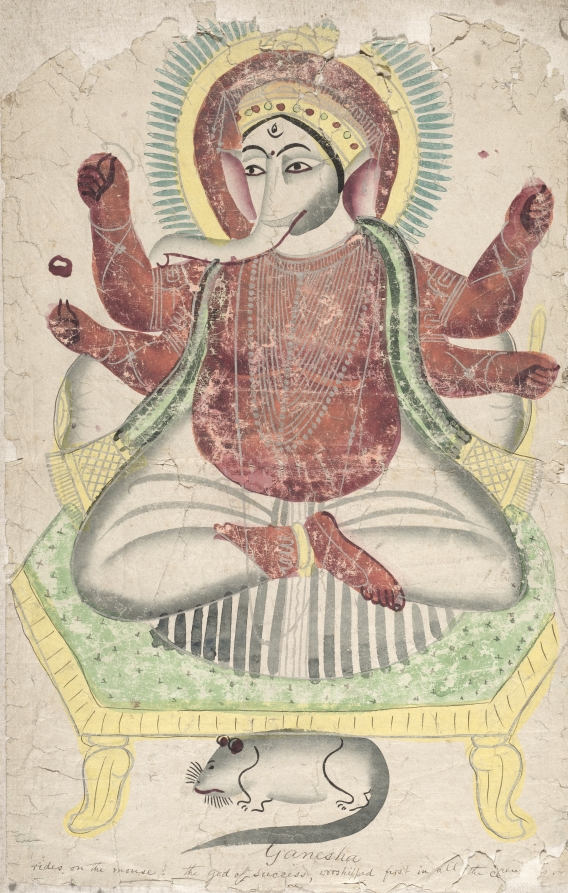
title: Ganesh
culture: Eastern India, Bengal, Kolkata, Kalighat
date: c. 1890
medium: Gum tempera, graphite, and tin on paper lined with cloth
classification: Painting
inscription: [[lower center]] Ganesha rides on the mouse. The god of success, worshipped first in all the cerem[onie]s.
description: The elephant-headed deity who is worshipped as the remover of obstacles is shown here seated in majesty with a radiant halo. The painting has been executed in the rapid, gestural style used by artists at Kalighat to create inexpensive souvenirs for pilgrims to bring home for veneration in domestic devotional spaces.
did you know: His copious jewlery has been painted in tin, a less expensive metallic pigment than silver.